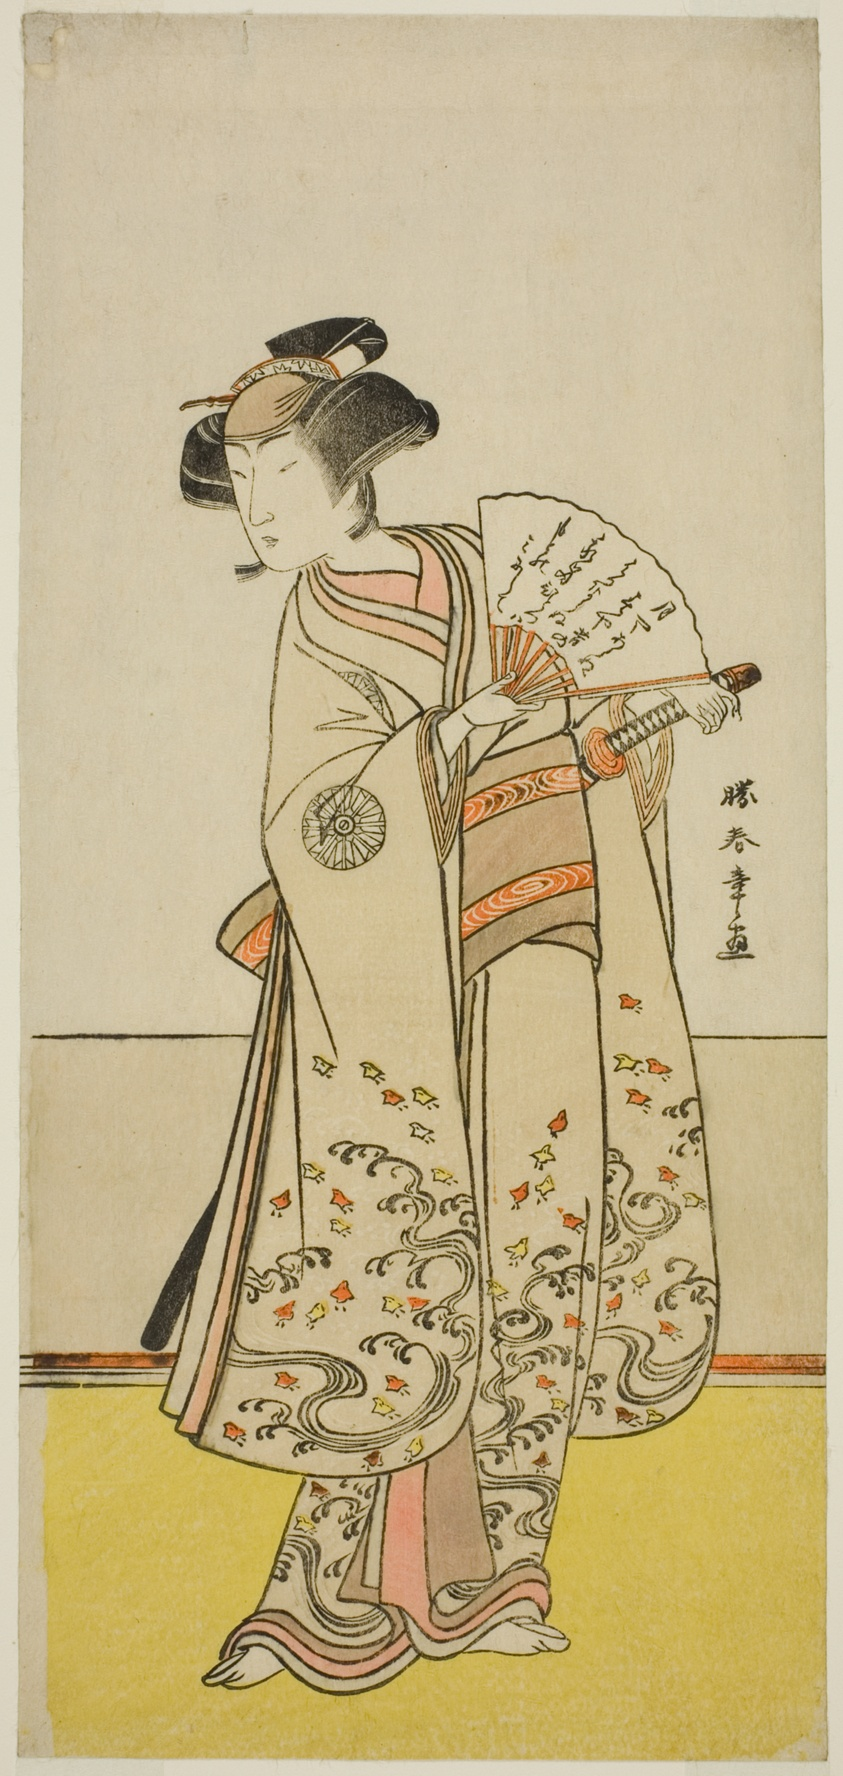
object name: Print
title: The Actor Nakamura Noshio I as Oiso no Tora (?) in the Play Shida Yuzuriha Horai Soga (?), Performed at the Morita Theater (?) in the First Month, 1775 (?)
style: Japanese (culture or style)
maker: Katsukawa Shunsho 勝川 春章; Japanese, 1726-1792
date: c. 1775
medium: Color woodblock print; hosoban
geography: Japan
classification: woodblock print; print; asian art